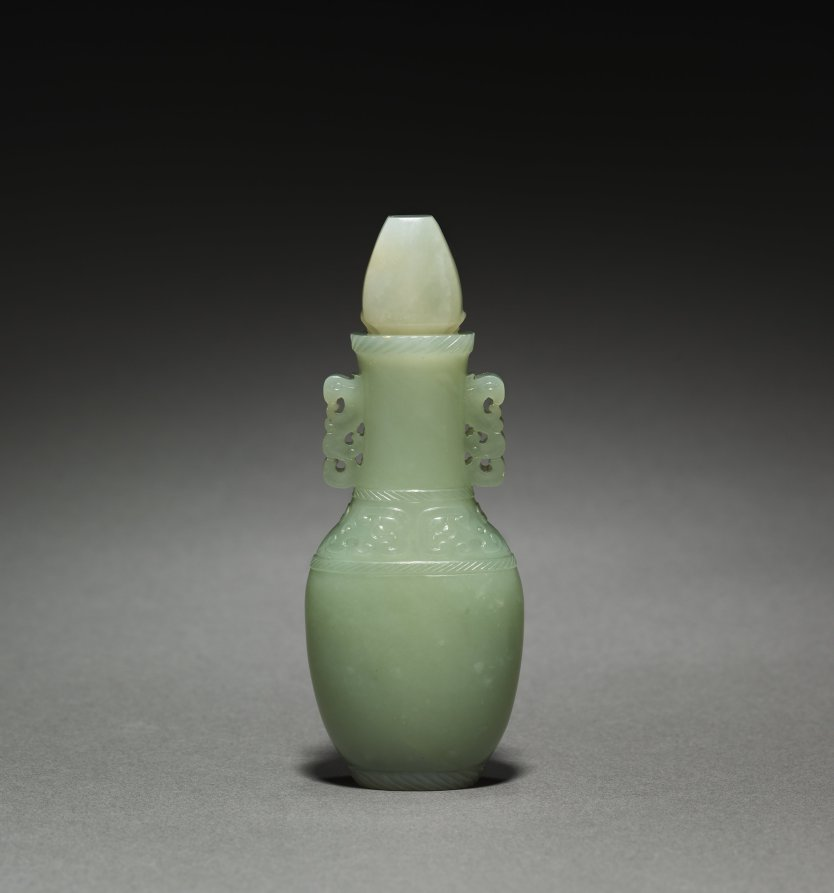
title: Bottle with Stopper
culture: China, Qing dynasty (1644–1911), Qianlong reign (1736–95)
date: 1736–95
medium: jade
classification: Jade